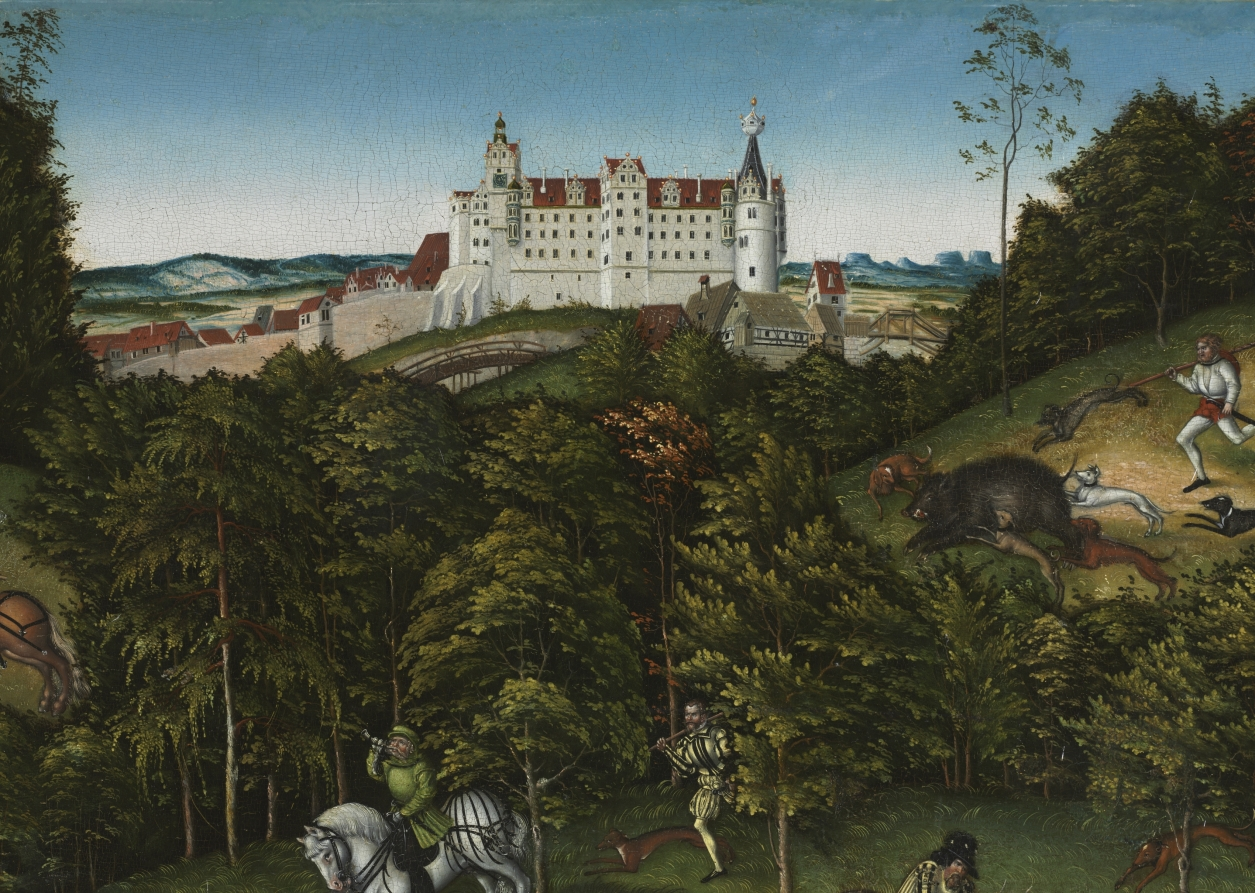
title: Hunting near Hartenfels Castle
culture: Germany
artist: Lucas Cranach (German, 1472–1553)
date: 1540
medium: oil, originally on wood, transferred to masonite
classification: Painting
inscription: Signed lower right on boat with a winged serpent, and dated: 1540 [inventory number, lower right: 1577]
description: The Protestant rulers of Saxony commissioned this animated hunt scene, set near their residence seen in the background, Hartenfels Castle (in eastern Germany). John Frederick the Magnanimous, in the bottom left corner, wears dark green hunting attire; he spans his crossbow and waits for his courtiers and dogs to chase a stag across the river. His wife, the Electress Sibylle, stands at right, poised to take the first ceremonial shot. The prince electors of Saxony were passionate practitioners of hunting with dogs—elaborate, highly rehearsed occasions, coordinated by the use of signals from hunting horns. Cranach dated this work and his signature is the winged snake at lower right. 1577 in the right corner is an inventory number.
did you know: Humans, dogs, and deer make up most of the creatures in this busy scene—but not all of them! Look closely at the background to spot a bear and three boars.